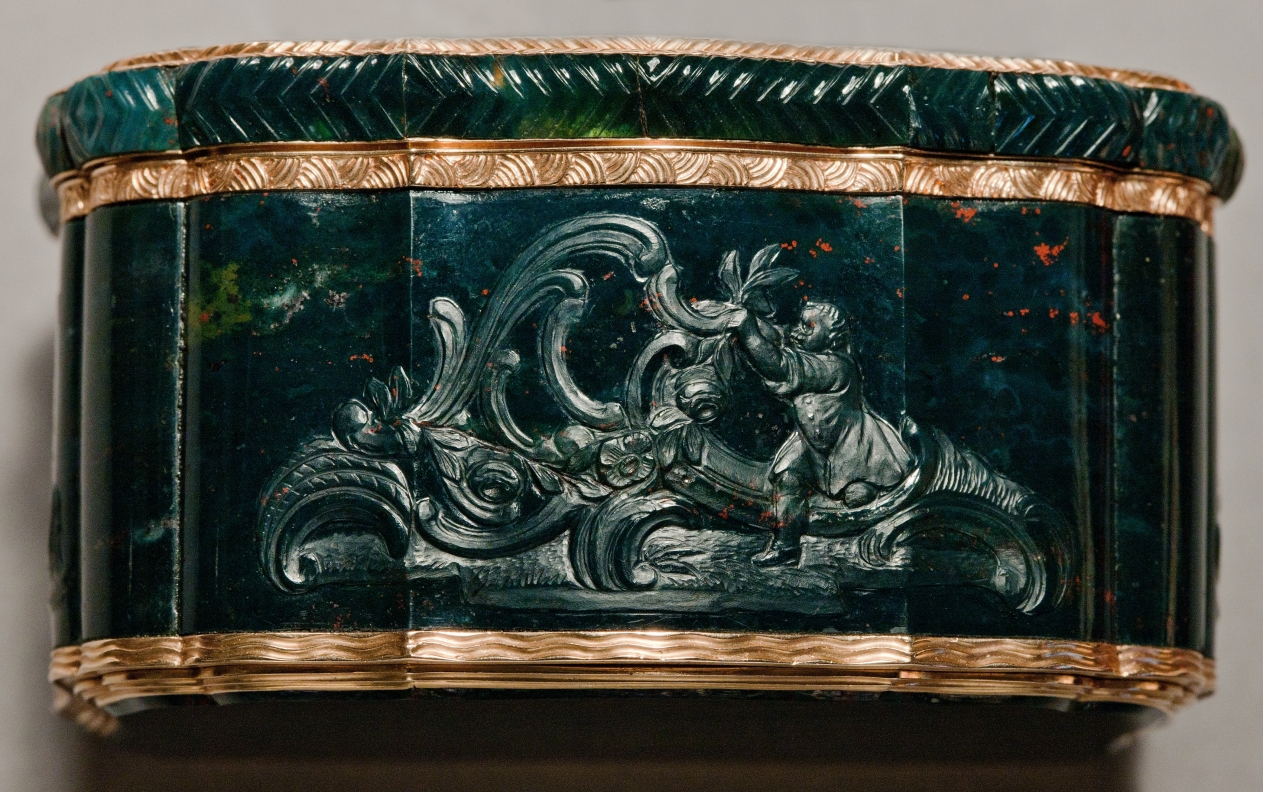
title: Snuff Box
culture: Germany, Berlin, mid-18th century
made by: attributed to Johannes George Klette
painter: Carl Gustav Klingstedt (Swedish, 1657–1734)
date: c. 1750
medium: gold-mounted carved bloodstone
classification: Miscellaneous